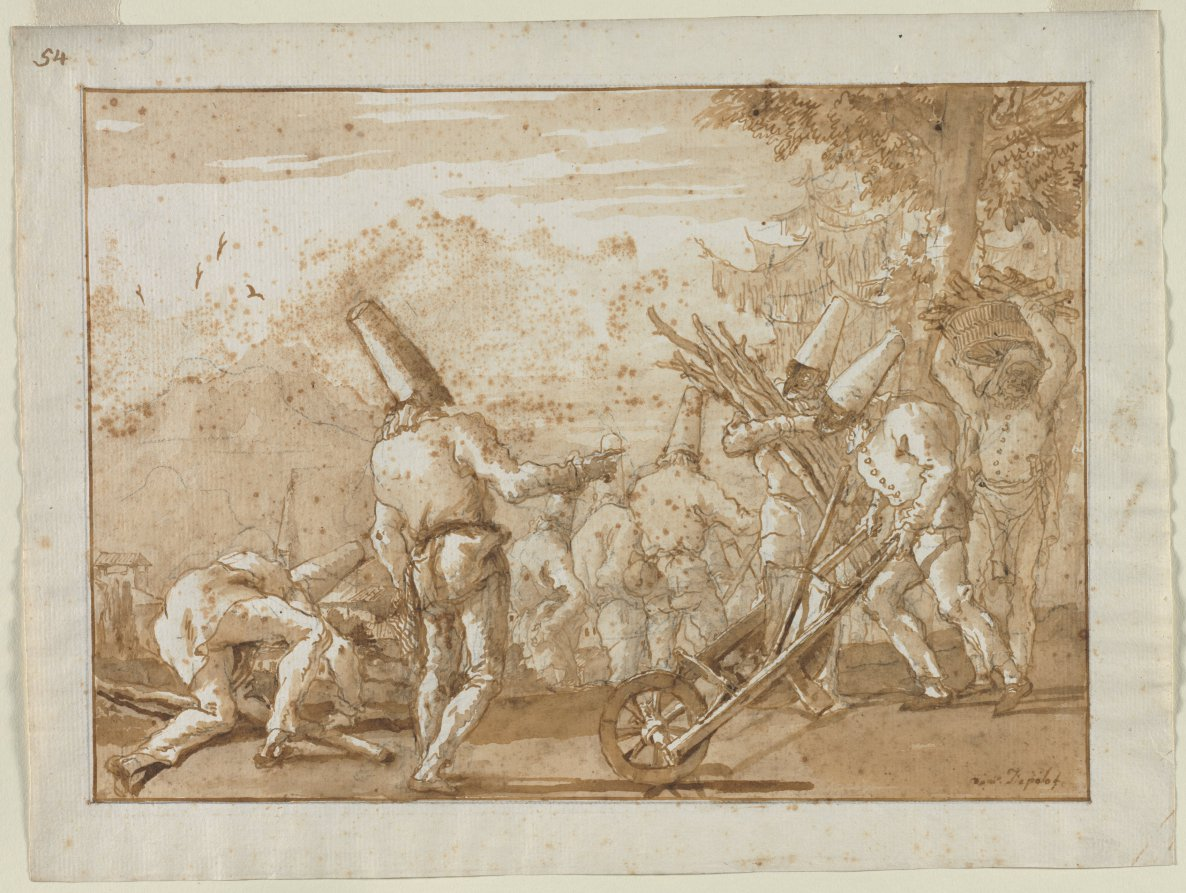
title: Gathering Wood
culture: Italy, 18th century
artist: Giovanni Domenico Tiepolo (Italian, 1727–1804)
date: late 1790s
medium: pen and brown ink and brush and brown wash over black chalk; framing lines in brown ink and graphite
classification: Drawing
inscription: signed, lower right, in brown ink: Dom°. Tiepolo f ; upper left, in brown ink: 54 ; VERSO, upper center, in graphite: 9 - [sideways] ; upper right, in blue pencil: [S?]